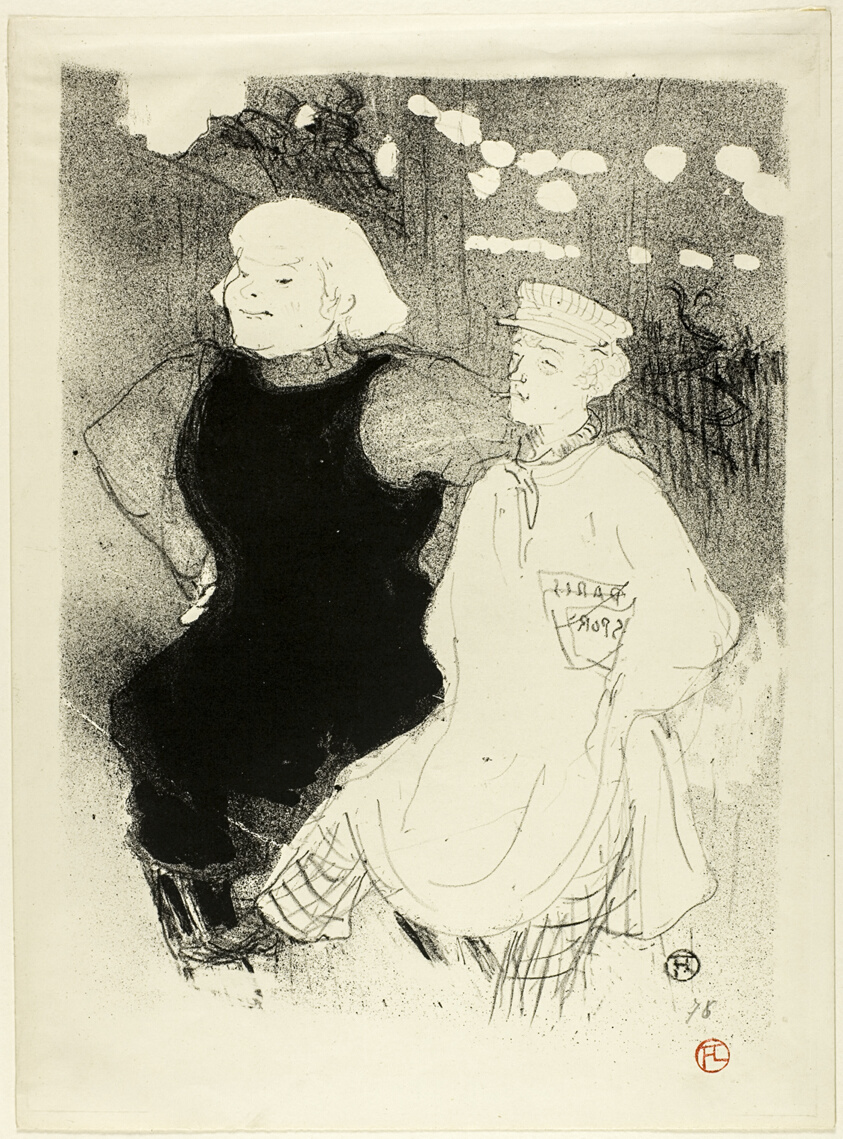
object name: Print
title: At the Moulin Rouge: the Franco-Russian Alliance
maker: Henri de Toulouse-Lautrec (French, 1864-1901)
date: 1893, published 1894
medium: Lithograph on cream wove paper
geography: France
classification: lithograph; print; prints and drawing